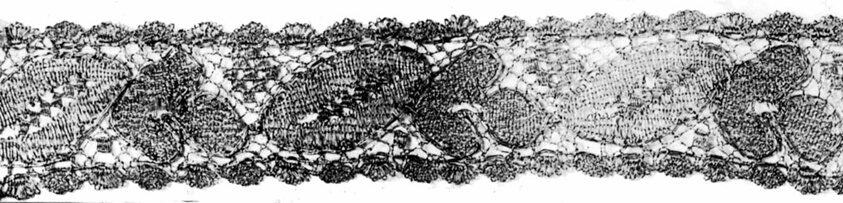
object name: Textile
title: Braid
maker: Europe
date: 1701/50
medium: Gold gilt-silver-strip-wrapped silk, bobbin straight lace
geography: Europe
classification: textile; lace - bobbin